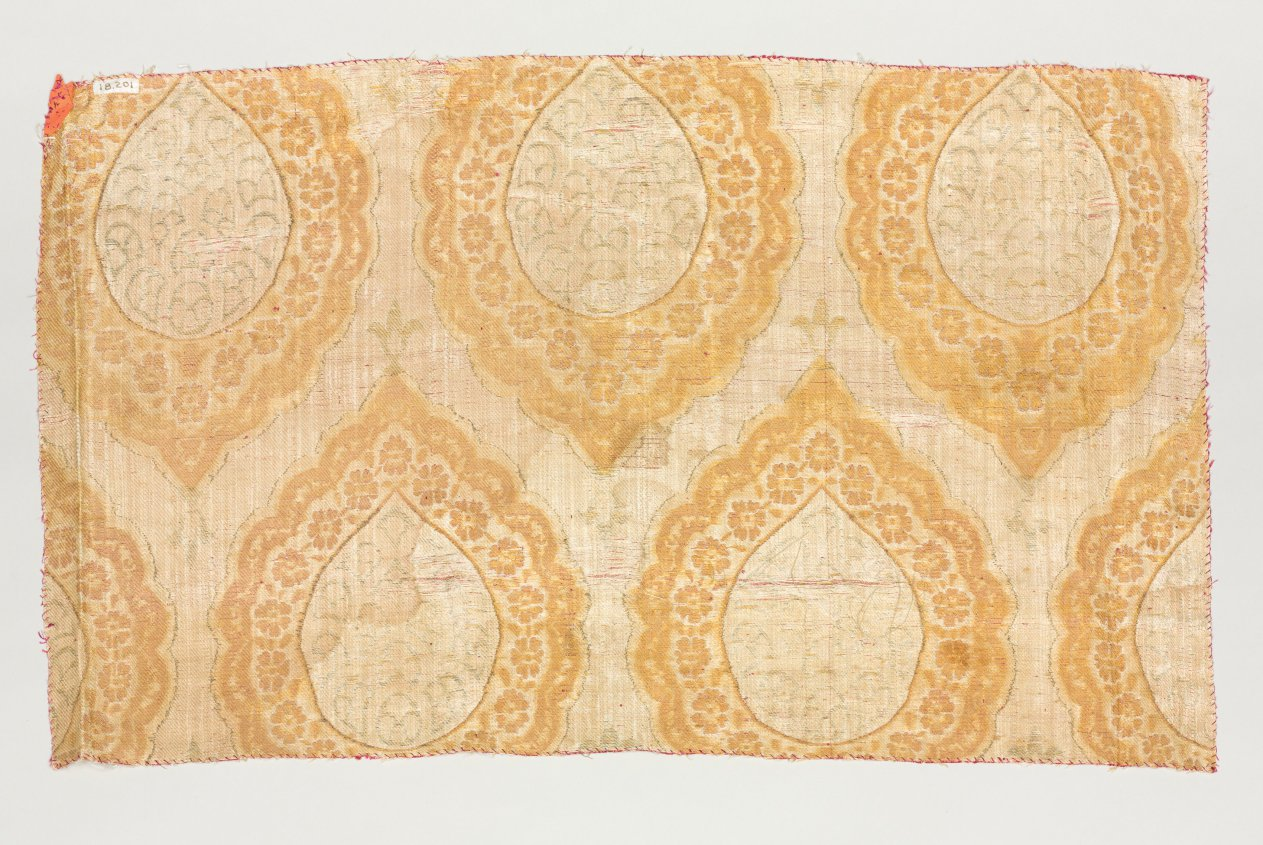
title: Brocade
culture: Turkey, Bursa, first half of 17th Century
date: 1600–1650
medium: brocade, silk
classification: Textile